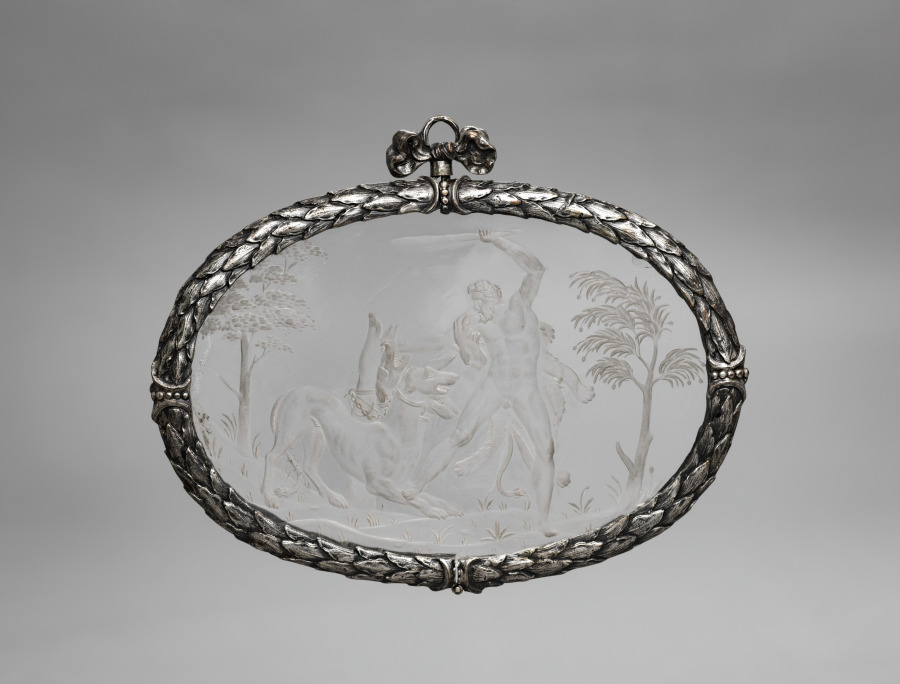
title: Hercules Conquering Cerberus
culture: Italy, 17th century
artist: attributed to Annibale Fontana (Italian, 1540–1587)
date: before 1584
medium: rock crystal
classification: Rock crystal